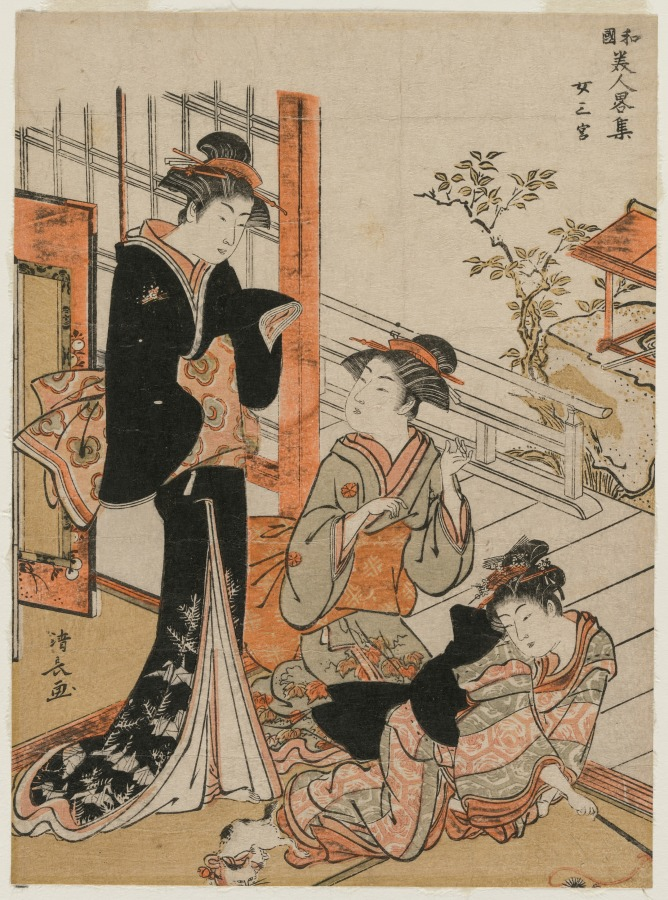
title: Three Women (from the series A Brief Collection of Japanese Beauties)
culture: Japan, Edo period (1615–1868)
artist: Torii Kiyonaga (Japanese, 1752–1815)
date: 1781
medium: color woodblock print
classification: Print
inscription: Signature: Kiyonaga ga